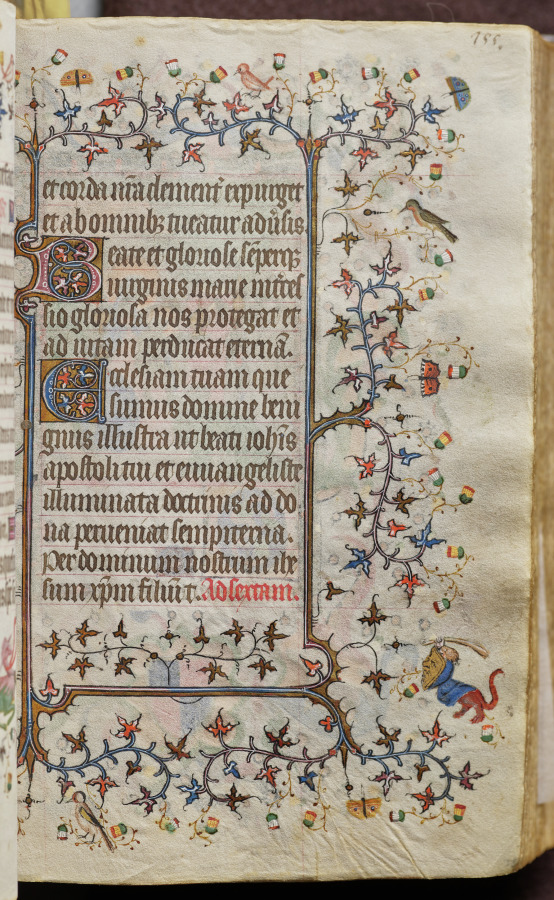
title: Hours of Charles the Noble, King of Navarre (1361-1425): fol. 78r, Text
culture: France, Paris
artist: Master of the Brussels Initials and Associates (French)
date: c. 1405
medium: ink, tempera, and gold on vellum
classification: Bound Volume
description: This precious volume was obviously highly prized by its owner, the French-born King of Navarre, who had his coat of arms painted on no less than twenty folios. Rather than directly commissioning this manuscript from a specific workshop, it seems that Charles the Noble acquired his book of hours -- perhaps ready-made for the luxury market -- while on a trip to Paris in 1404-05. A collaborative effort, six painting styles are evidenced within the pages of this codex, those of two Italians, two Frenchmen, and two Netherlanders. The painter who was responsible for the planning and decoration of the book, and who produced seventeen of the large miniatures, was a Bolognese artist known as the Master of the Brussels Initials. His principal assistant, responsible for most of the borders, was a Florentine who signed his name "Zecho" da Firenze on folio 208 verso.